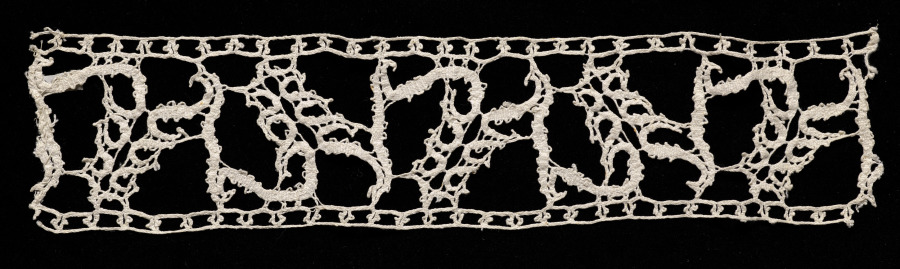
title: Lace Insertion with Selvage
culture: Italy, Venice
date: 1500s–1600s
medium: Bobbin lace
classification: Lace